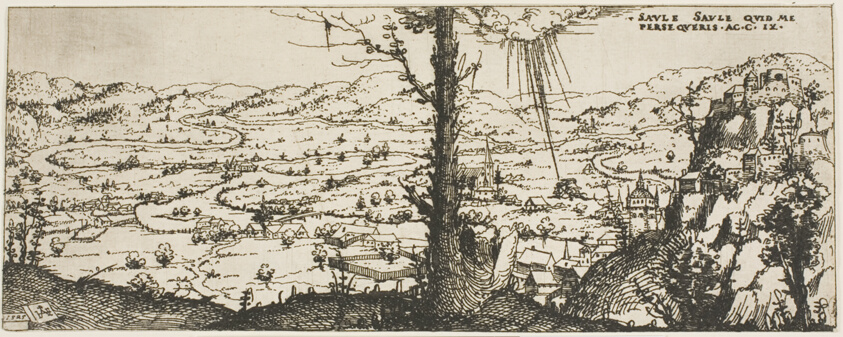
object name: Print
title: Landscape with a Tree in Center of Foreground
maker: Augustin Hirschvogel (German, 1503-1553)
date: 1545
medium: Etching on paper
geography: Germany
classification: etching; print; prints and drawing